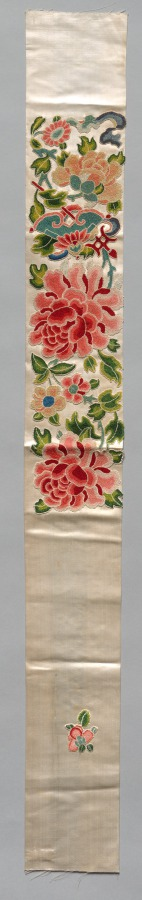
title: Sleeve Band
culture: China, Qing dynasty (1644-1911) or Republican period (1912-49)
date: 1880–1940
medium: Silk, embroidery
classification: Garment